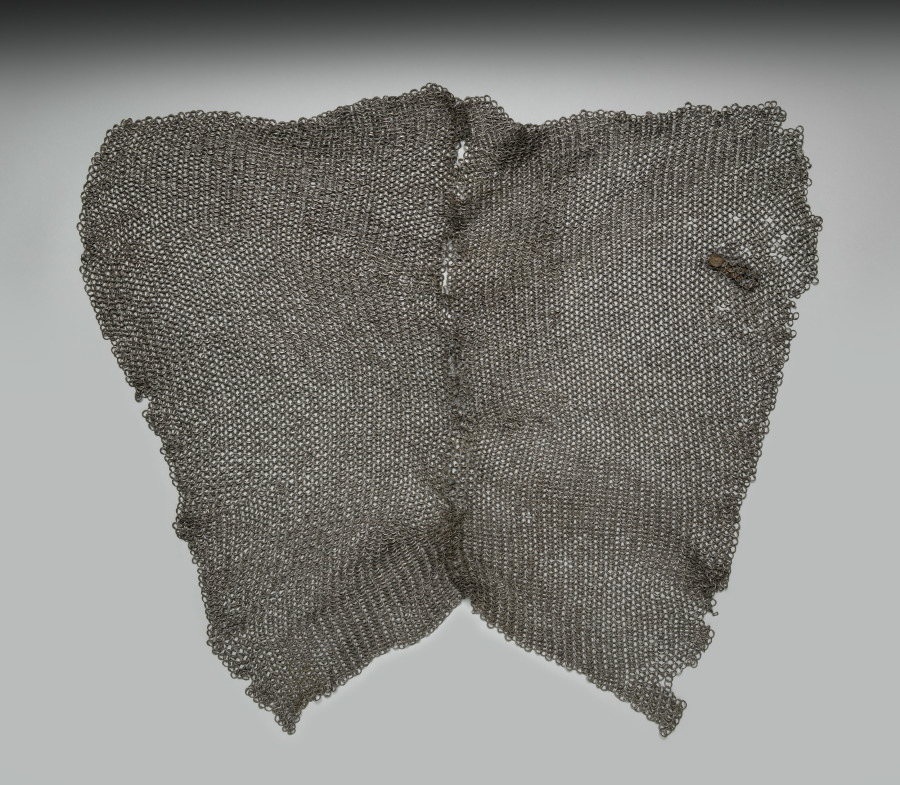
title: Hauberk of Chain Mail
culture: Europe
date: 1400s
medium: steel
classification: Arms and Armor